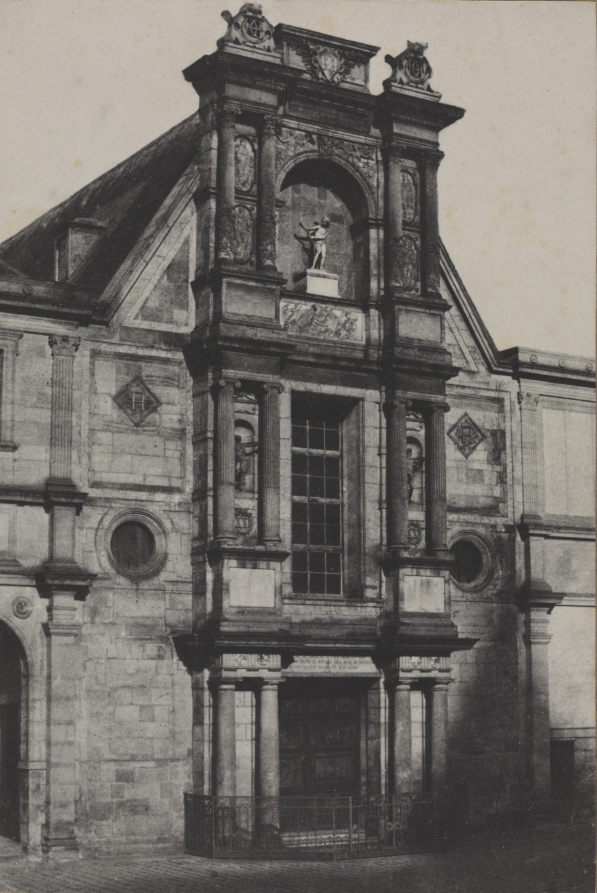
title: Portico of the Château d'Anet, now at the École des Beaux-Arts, Paris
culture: France, 19th century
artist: Charles Marville (French, 1813–1879)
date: 1851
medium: salted paper print, Blanquart-Évrard process, from waxed-paper negative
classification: Photograph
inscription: Written in pencil on recto of mount: "Mr. Foster, Architect / 4 Park Street"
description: Some buildings in Paris illustrate multiple layers of French history. This entrance was once part of the Château d’Anet, built in 1548–50 in northern France by King Henri II for his mistress. This section of the facade was rescued from a campaign during the French Revolution to destroy symbols of the former monarchy. It was moved to Paris to a repository of cultural artifacts and later incorporated into a renovation and expansion of the buildings housing the national school for fine arts, the Beaux-Arts de Paris, where it remains to this day.